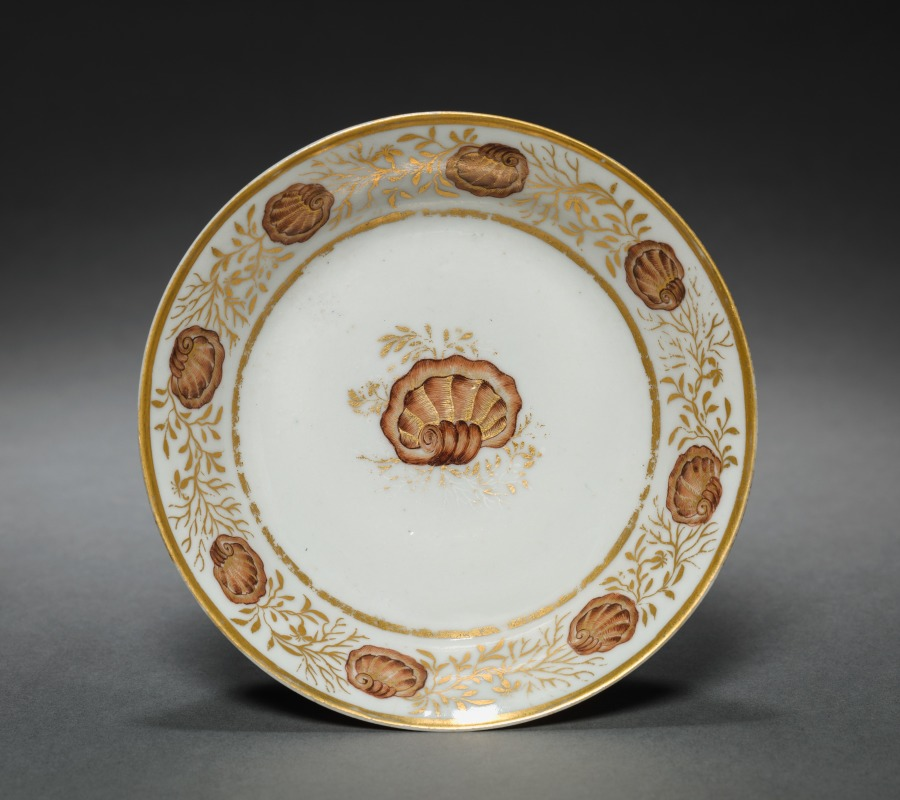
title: Saucer from Oliver Wolcott, Jr. Tea Service (6 of 6)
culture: Chinese Export porcelain, late 18th-early 19th century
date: 1785–1805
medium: porcelain, sepia enamel, gold leaf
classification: Ceramic